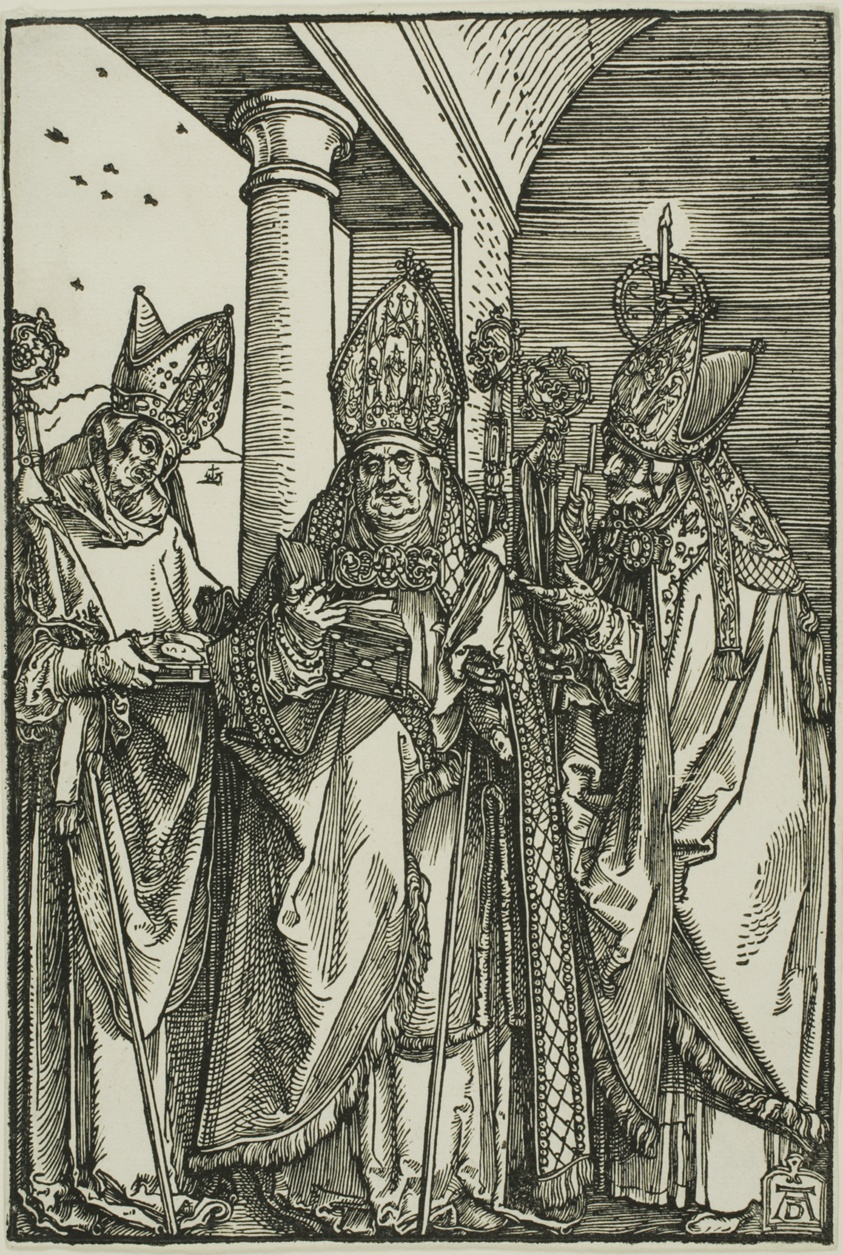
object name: Print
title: Saints Nicholaus, Ulrich, and Erasmus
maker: Albrecht Dürer (German, 1471-1528)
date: c. 1504–08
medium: Woodcut in black on ivory laid paper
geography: Germany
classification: woodcut; print; prints and drawing; paper